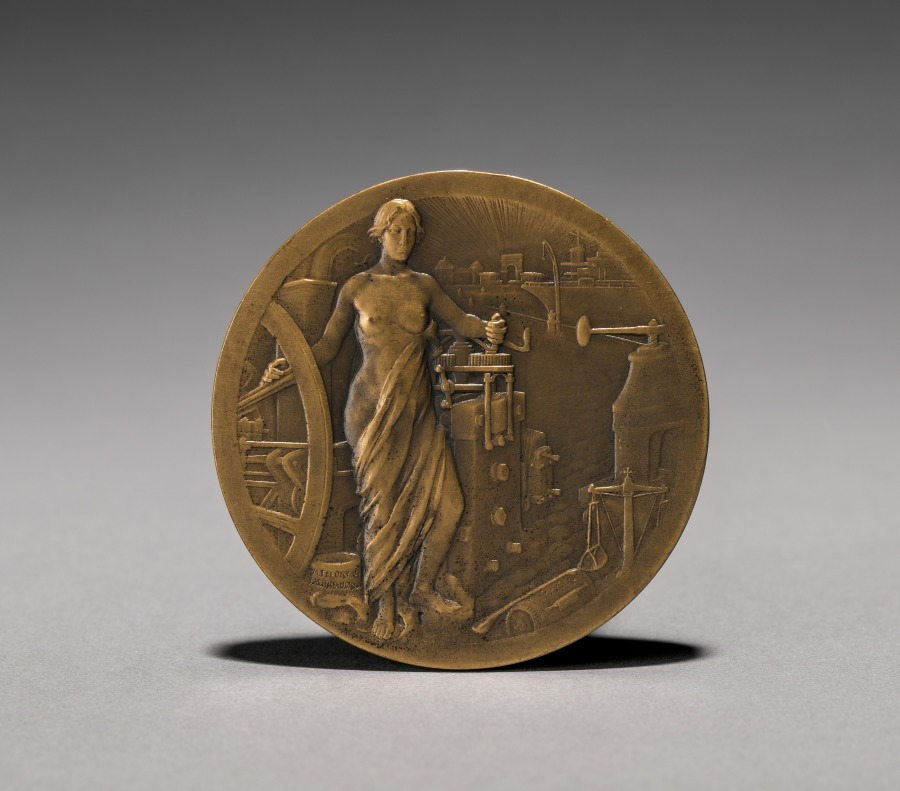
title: Medal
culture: France, 20th century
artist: Edmond-Eugene-Emile Lindauer (French, 1869–1942)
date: 1918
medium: bronze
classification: Metalwork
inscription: reverse - "La Monnaie au Port de Rochefort"